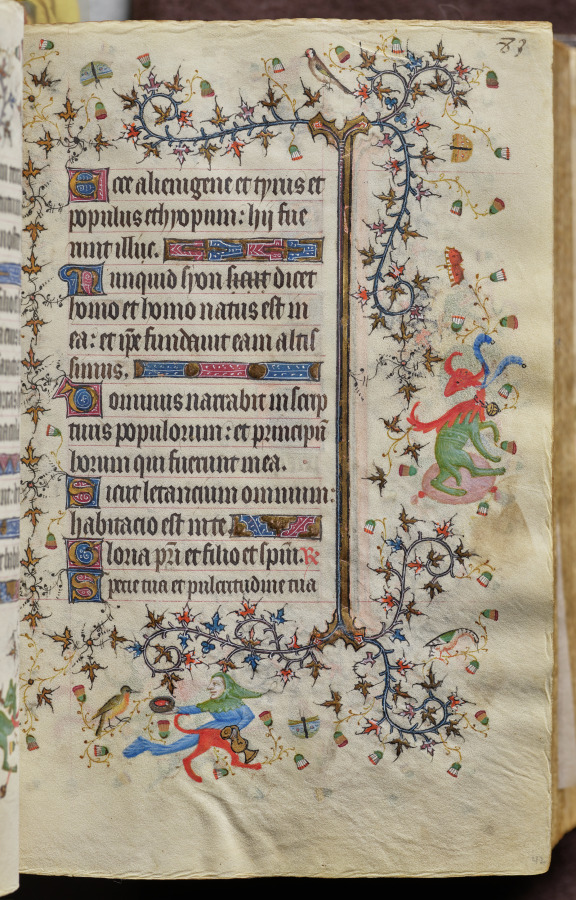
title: Hours of Charles the Noble, King of Navarre (1361-1425): fol. 42r, Text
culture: France, Paris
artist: Master of the Brussels Initials and Associates (French)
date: c. 1405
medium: ink, tempera, and gold on vellum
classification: Bound Volume